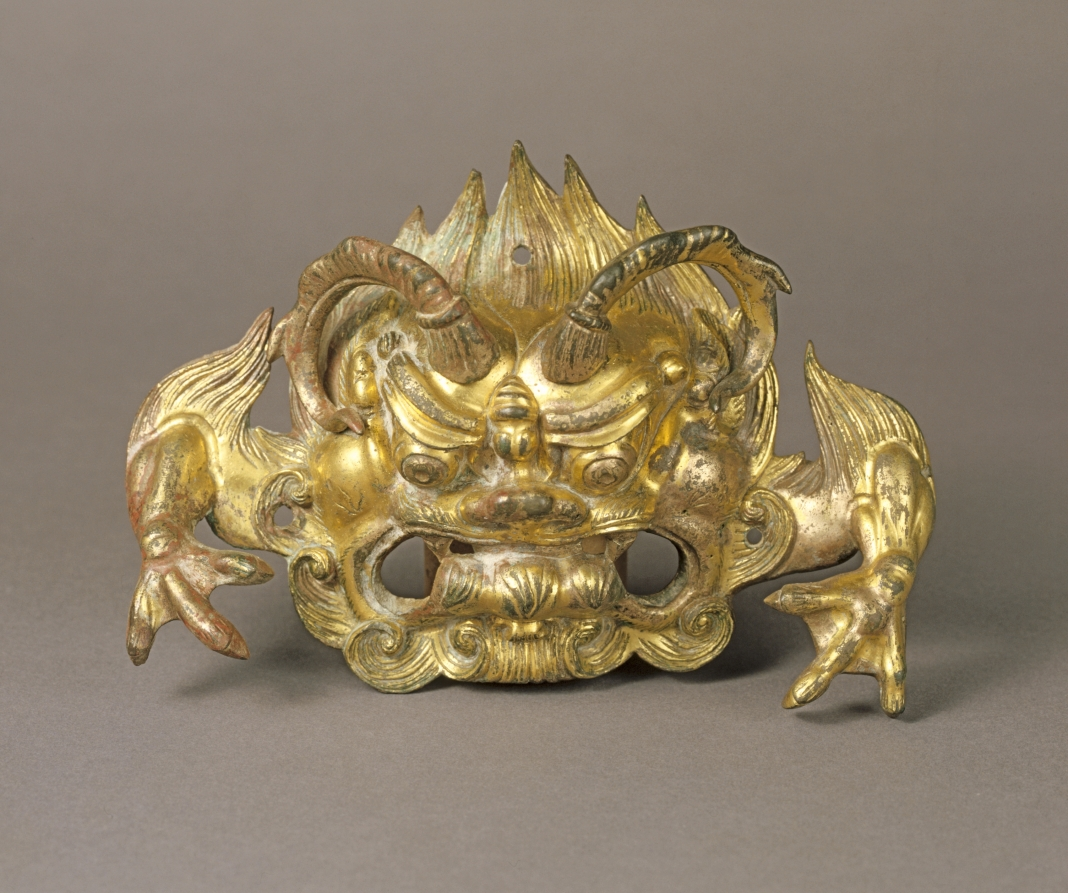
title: Monster Face: Door Ring Holder (Pushou)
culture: China, Henan province, Northern Dynasties period (386–581 CE)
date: 500s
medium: gilt bronze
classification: Metalwork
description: This gilt bronze Door Ring Holder is in the form of a monster head with curving horns, protruding eyes, three-clawed paws, curling beard, and flame-shaped hair. The tongue dangles from the mouth, in which the creature originally grasped a ring. While it had a practical function as a door knocker, the intimidating form could also frighten away both intruders and evil spirits.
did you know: Three rivet holes (one on the forehead and one by each limb) were used to nail the mask onto a door.